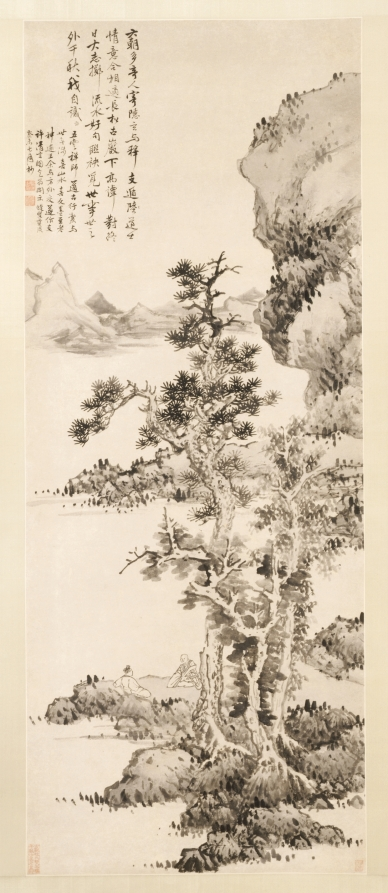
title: Zhi and Xu's Pure Conversation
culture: China, Ming dynasty (1368–1644)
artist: Lan Ying (Chinese, 1585–after 1664)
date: 1643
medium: Hanging scroll; ink on paper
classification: Painting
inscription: 六朝多奇人，寄隱玄與釋。/ 支遁許道士，情意合相適。/ 長松古巖下，高譚對終日。/ 大志擲流水，好句聯袂覓。/ 世事世之外，千秋我自識。 五雲禪師道古行潔，與世無涉。喜山水，喜文 墨。至老神逾王。余與方外交，遂作支許清言 圖，乞為開示。 蝶叟藍瑛癸未七月杪。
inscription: 2 additional seals of Cheng Qi 程琦 (1911–1988)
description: Lan Ying’s painting is a gift to his friend, the Chan monk Wuyun, in which he depicted two sages of the Six Dynasties period: the Buddhist monk Zhidun (314–366 CE), and the Daoist priest Xu Xun (265–420 CE). Meant to be understood as an analogy of the friendship between artist and monk, the painting also offered a retreat into the past, a year before the fall of the Ming dynasty. A professional painter born in Hangzhou, Lan Ying is traditionally considered a last representative of the Zhe school. Lan wrote poetic inscriptions and interacted with the literatus Chen Jiru (1558–1639).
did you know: This painting serves as an analogy of the friendship between artist and monk.